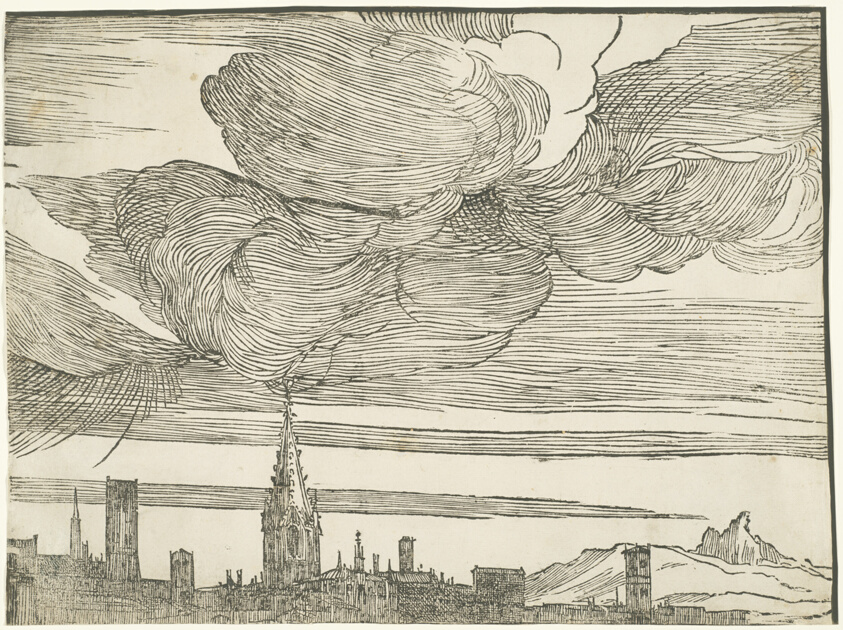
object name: Print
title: The Submersion of Pharaoh's Army in the Red Sea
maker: After Titian (Italian, c. 1488-1576); published by Domenico dalle Greche (Italian, active 1543-1558)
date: c. 1515, printed 1549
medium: Woodcut in black on ivory laid paper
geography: Italy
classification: woodcut; print; prints and drawing